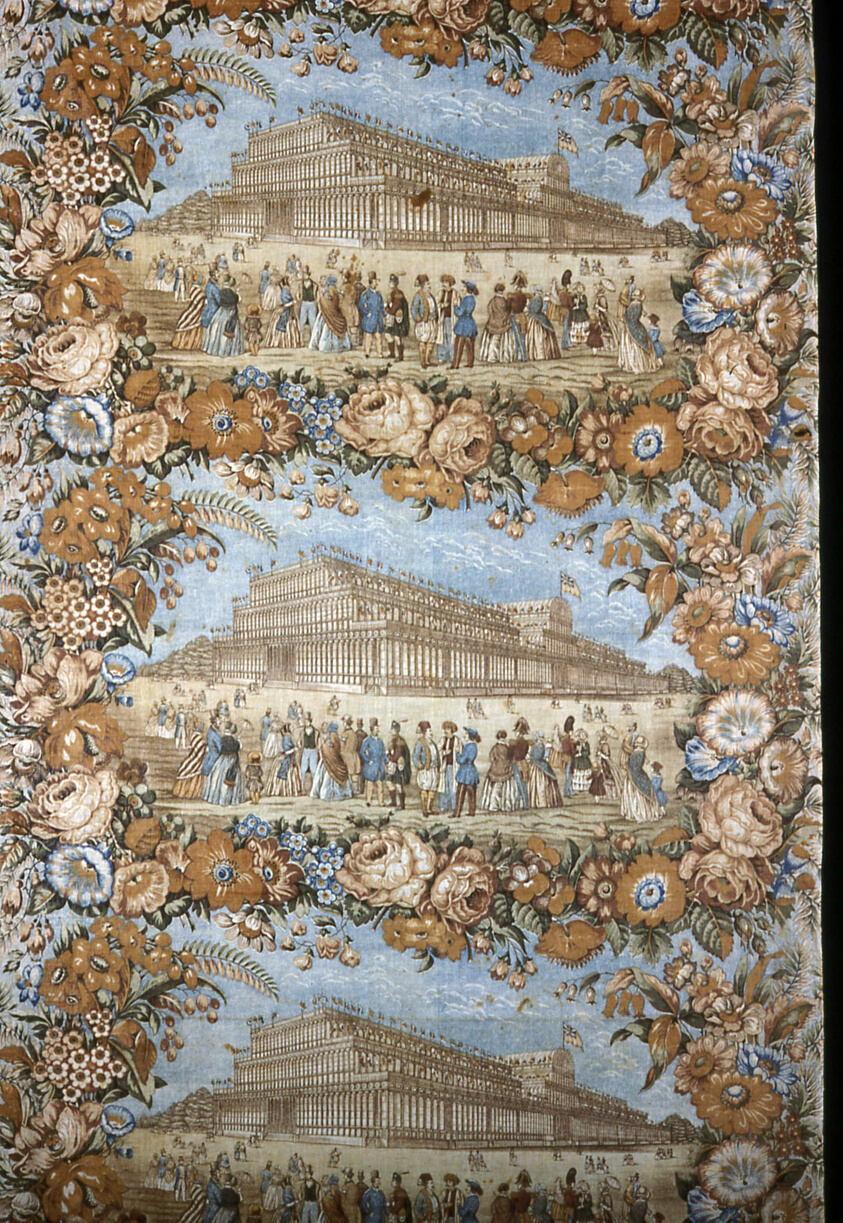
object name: Textile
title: Panel (Furnishing Fabric)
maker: Probably Manufactured by Wright & Lee; England, probably Manchester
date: c. 1851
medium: Cotton, plain weave; engraved roller printed; glazed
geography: England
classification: textile; weaving - printed; furnishing textile